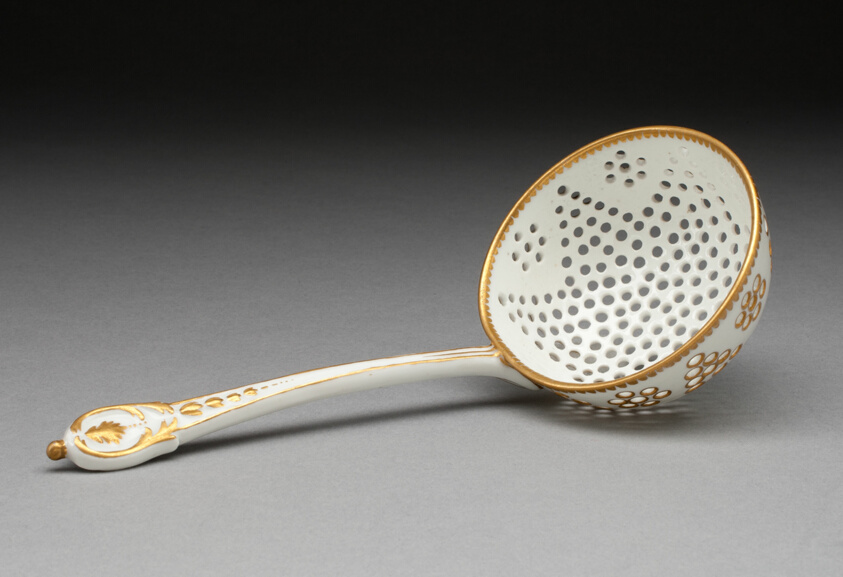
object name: Ceramics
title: Sugar Sifter Spoon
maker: Sèvres Porcelain Manufactory; French, founded 1740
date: 1750/65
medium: Soft-paste porcelain and gilding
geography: Sèvres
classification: tableware; ceramics; porcelain; european decorative arts